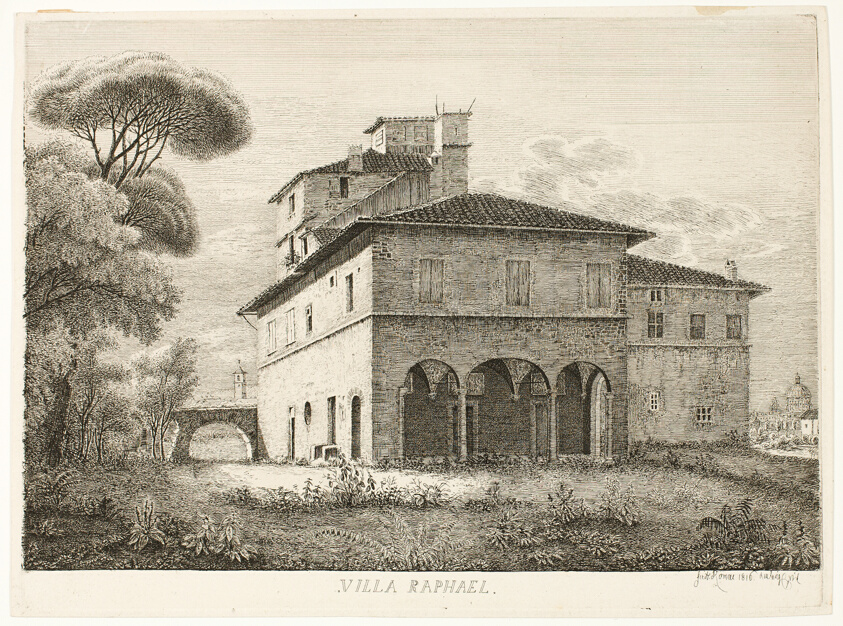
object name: Print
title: Villa Raphael, Rome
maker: Ludwig Emil Grimm (German, 1790-1863)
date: 1816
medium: Etching on paper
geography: Germany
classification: etching; print; prints and drawing